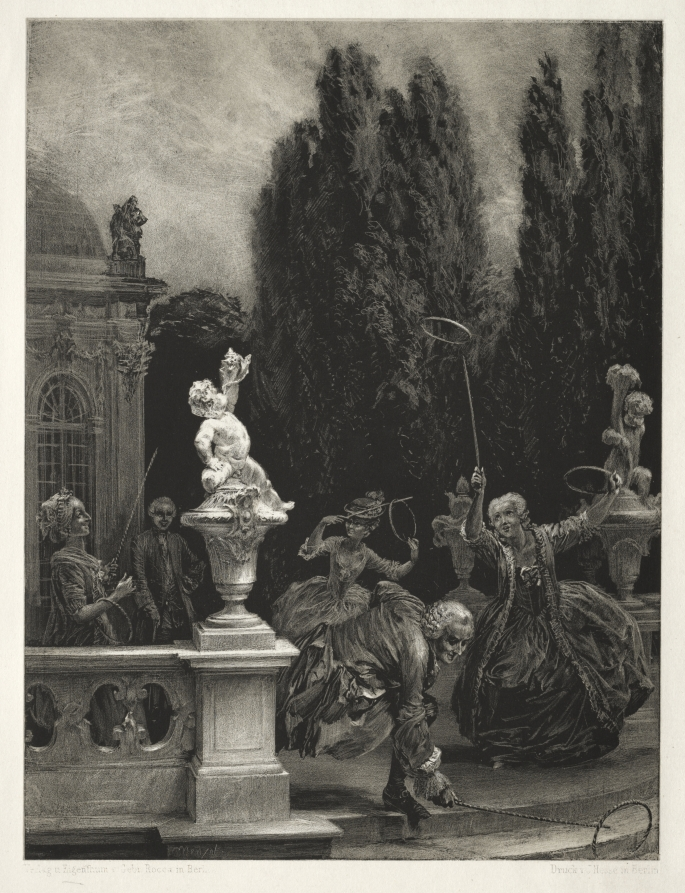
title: Essay on Stone with Brush and Scraper: Playing at Hoops on the Castle Terrace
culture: Germany, 19th century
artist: Adolph von Menzel (German, 1815–1905)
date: 1851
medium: lithograph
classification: Print